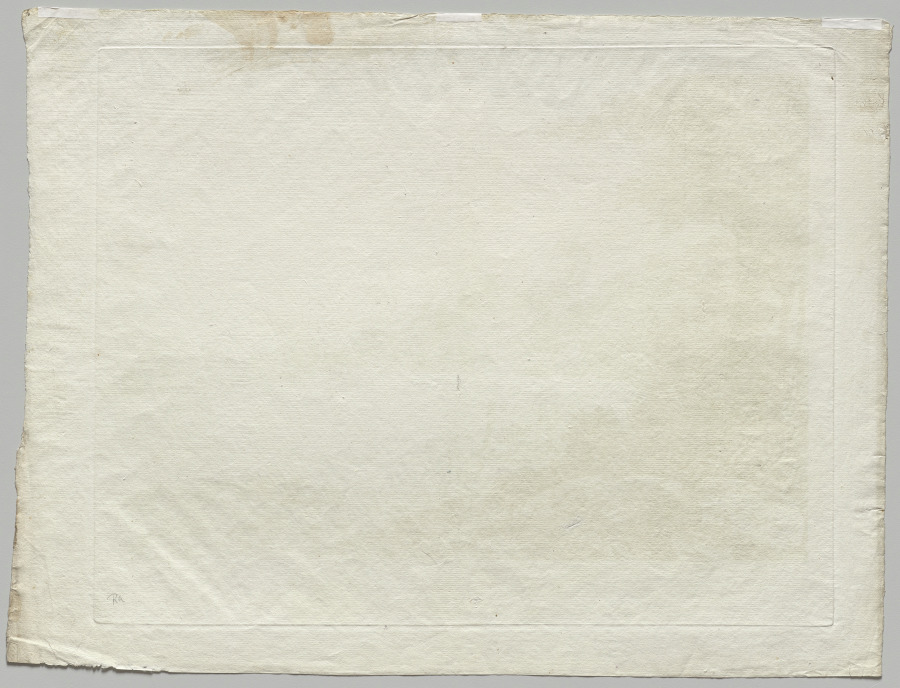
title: Landscape with Tharandt Castle Ruins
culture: Switzerland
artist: Adrian Zingg (Swiss, 1734–1816)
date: c. 1800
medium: etching on laid paper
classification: Print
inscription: watermark: D & G BLAUW (High Crown countermark)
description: Swiss artist Adrian Zingg made the landscape of Saxony his primary and almost exclusive subject and sought out dramatic views, often featuring the country’s distinctive waterfalls, landscapes, and ruins, to convey its grandeur while maintaining a topographical precision. These two prints depict the ruins of Tharandt castle, a medieval structure outside Dresden. Zingg traveled to the site to sketch with friends, captivated by the juxtaposition between nature’s grandeur and the castle’s impermanence.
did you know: Soon after Adrian Zingg sketched this view in the village of Tharandt, the area became popular among tourists for its dramatic views.